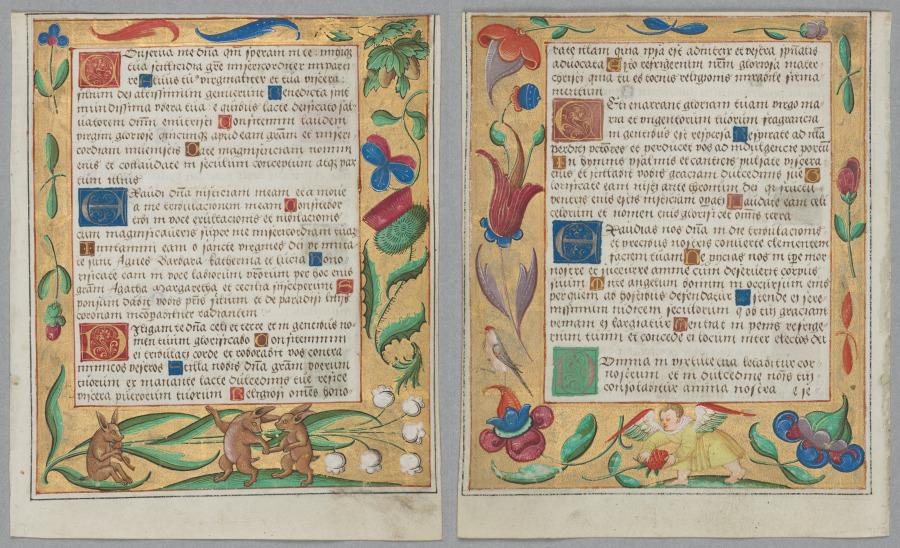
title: Leaf from a Psalter and Prayerbook: Rabbits Dancing (recto) and Putto Picking Strawberries (verso)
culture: Germany, Hildesheim (?), 16th century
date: c. 1524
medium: Ink, tempera and liquid gold on vellum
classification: Manuscript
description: This leaf from a psalter and prayerbook is intricately decorated and was probably produced for use in a private noble family. The prominent mention of Saint Godehard (died 1038), Bishop of Hildesheim, in the original manuscript suggests that it was produced for use in the diocese of Hildesheim (Norther Germany).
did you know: On the front side are three rabbits, one playing a Hirtenschalmei (shepherd's shawm). This instrument is mentioned in medieval literature and poetry as being played by rustic types.